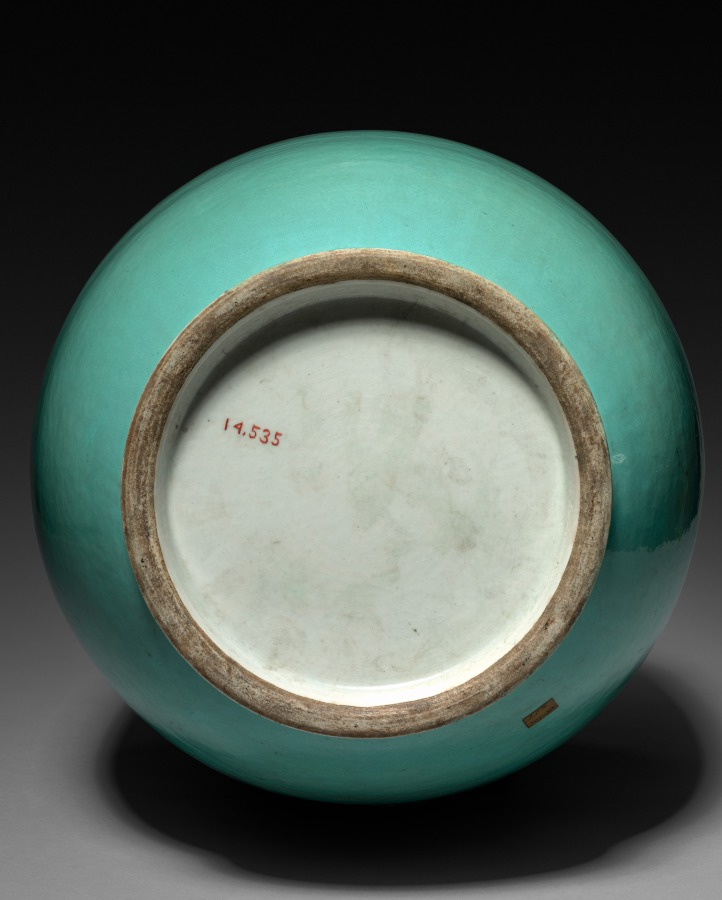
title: Vase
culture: China, Qing dynasty (1644–1911), Qianlong reign (1736–95)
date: 1736–95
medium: porcelain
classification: Ceramic